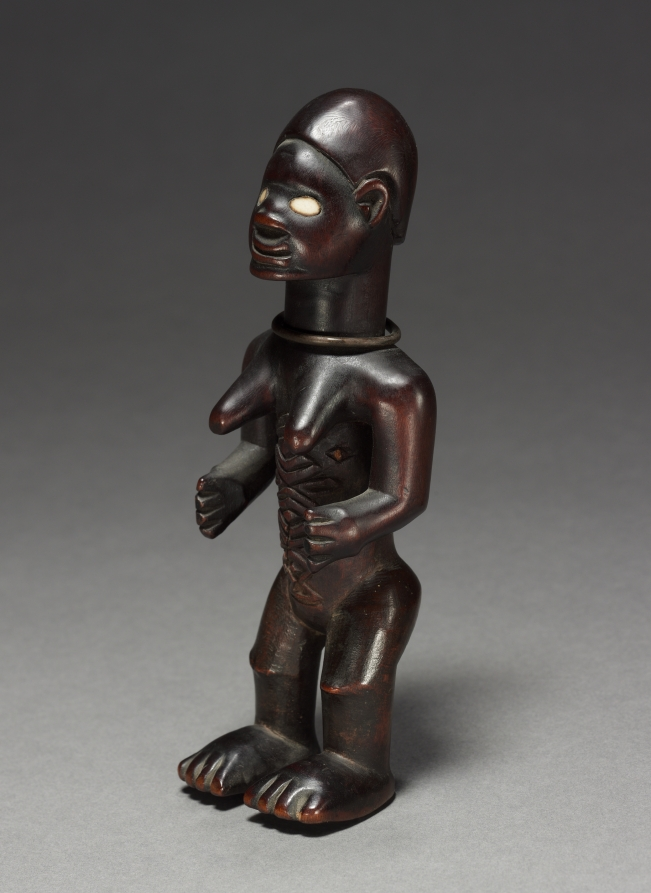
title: Female Figurine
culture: Africa, Central Africa, Republic of the Congo, Beembe-style maker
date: late 1800s-early 1900s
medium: Wood, possibly ceramic, and copper alloy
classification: Sculpture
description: Beembe figurines generally have greatly detailed anatomical and decorative features. The scarification among Beembe men and women communicated their ideas about local beauty and ethnic belonging. These figures are charged with an ancestor’s spirit through a mixture of resin and human-derived ingredients—taken from the corpse of the person they possibly portray—into a small cavity near the rectum.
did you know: The carvings in the figure’s abdomen reflect the custom of body scarification among the Beembe people.